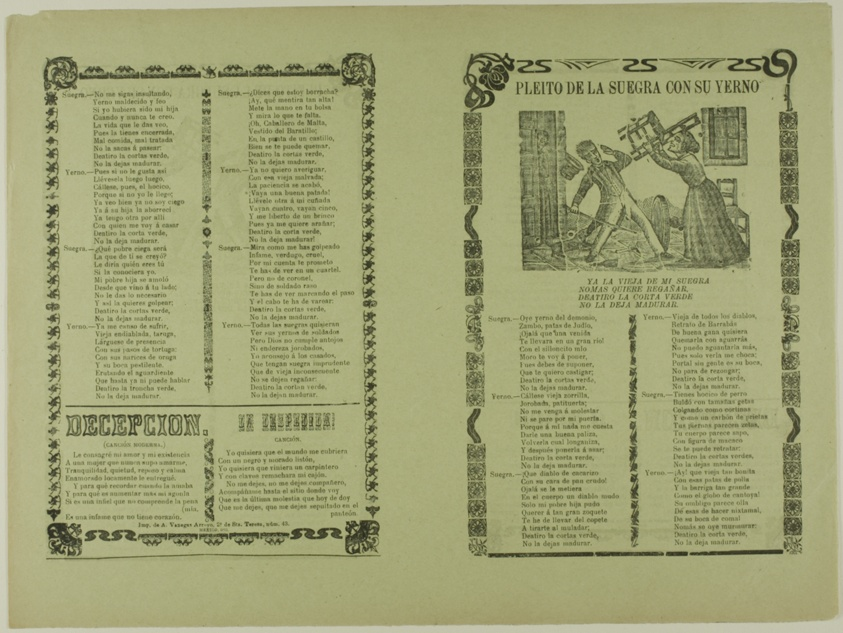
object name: Print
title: Quarrel between Mother-in-law and Son-in-law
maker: Manuel Manilla (Mexican, 1830-c. 1900)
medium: Photo relief etching on tan wove paper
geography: Mexico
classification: relief etching; print; prints and drawing